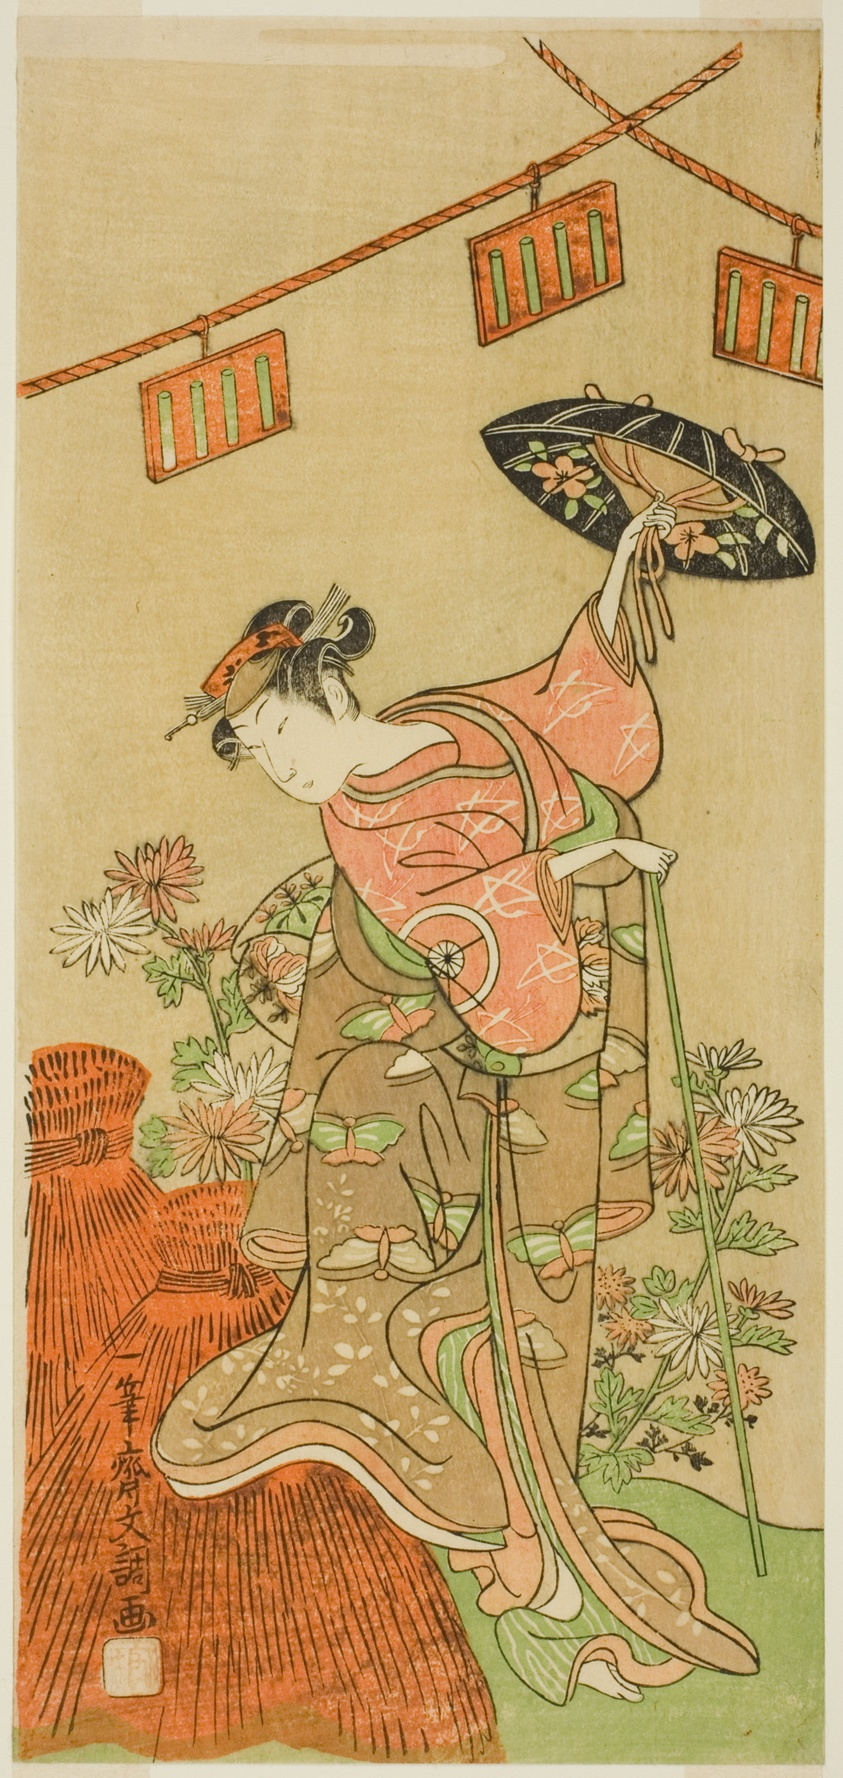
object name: Print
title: The Actor Iwai Hanshiro IV as Otatsu-gitsune in the Play Nue no Mori Ichiyo no Mato, Performed at the Nakamura Theater in the Eleventh Month, 1770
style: Japanese (culture or style)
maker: Ippitsusai Buncho (Japanese, active c. 1755-90)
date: c. 1770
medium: Color woodblock print; hosoban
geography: Japan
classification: woodblock print; print; asian art